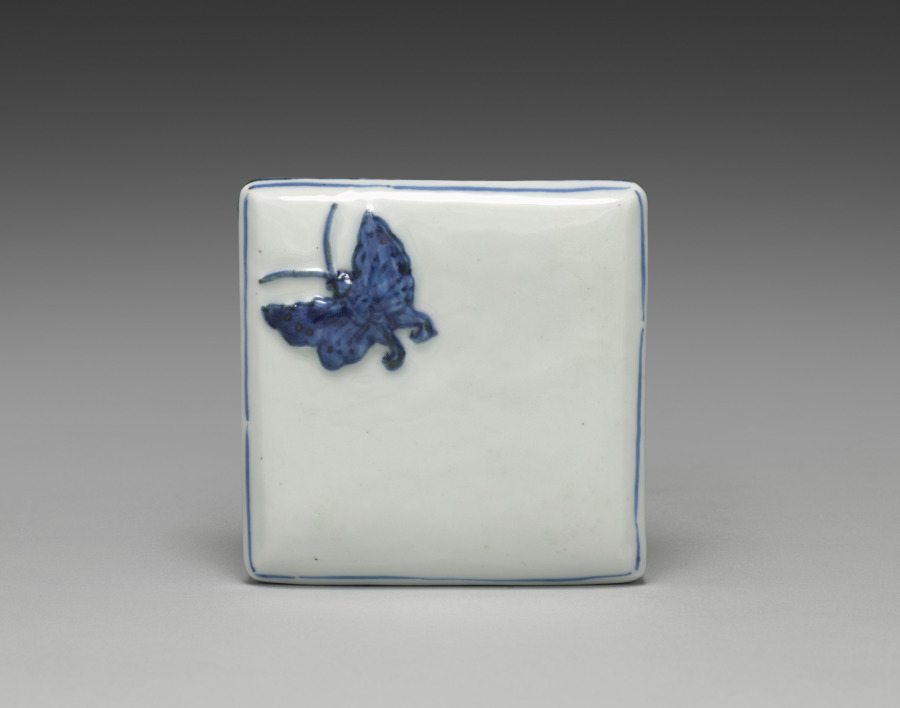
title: Lid for a Box with Butterfly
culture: Japan, Meiji period (1868–1912)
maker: Seifū Yohei I (Japanese, 1801–1861)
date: 1855–57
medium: Porcelain with underglaze blue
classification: Ceramic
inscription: 清風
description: This sturdy box, with comparatively thick walls and resulting heft, is sparsely decorated with a single butterfly motif in dark underglaze blue cobalt in one corner of the lid and with repeating floral patterns along the lid and base. Single broken lines of underglaze blue define the edge of the box lid’s top where it curves to meet the sides and again where it meets the base of the box. Another blue band runs around the upper rim of the base where it meets the lip, left unglazed for a better grip of the lid when the box is closed. Yohei I’s signature on the center of the recessed base is set within a wide blue square. The porcelain box is meant to call to mind a famous story attributed to Zhuang Zhou (c. 369–286 BCE), also known as Master Zhuang, or Zhuangzi, pronounced Soji in Japanese. The second chapter of Zhuangzi, his eponymous collection of anecdotes, records the story as follows: Once, Zhuang Zhou dreamt he was a butterfly flitting and fluttering about, happy with himself and doing as he pleased. He didn’t know that he was Zhuang Zhou. Suddenly, he woke up and there he was, solid and unmistakably Zhuang Zhou. But he didn’t know if he was Zhuang Zhou who had dreamt he was a butterfly, or a butterfly dreaming that he was Zhuang Zhou. Between Zhuang Zhou and the butterfly there must be some distinction! This is called the Transformation of Things. The lidded box resembles kosometsuke, the porcelains in underglaze blue made to order or on speculation for the Japanese market during the early to mid-1600s in Jingdezhen, China. These works were often made from designs submitted by Japanese clients, many of whom were masters of chanoyu, who sought the wares for their tea practice. The relative roughness of the clay and the distortions in the fired object were intentional, as they created the rustic effect desired by Japanese tea communities.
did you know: The bottom of the box is inscribed with the name Seifū.